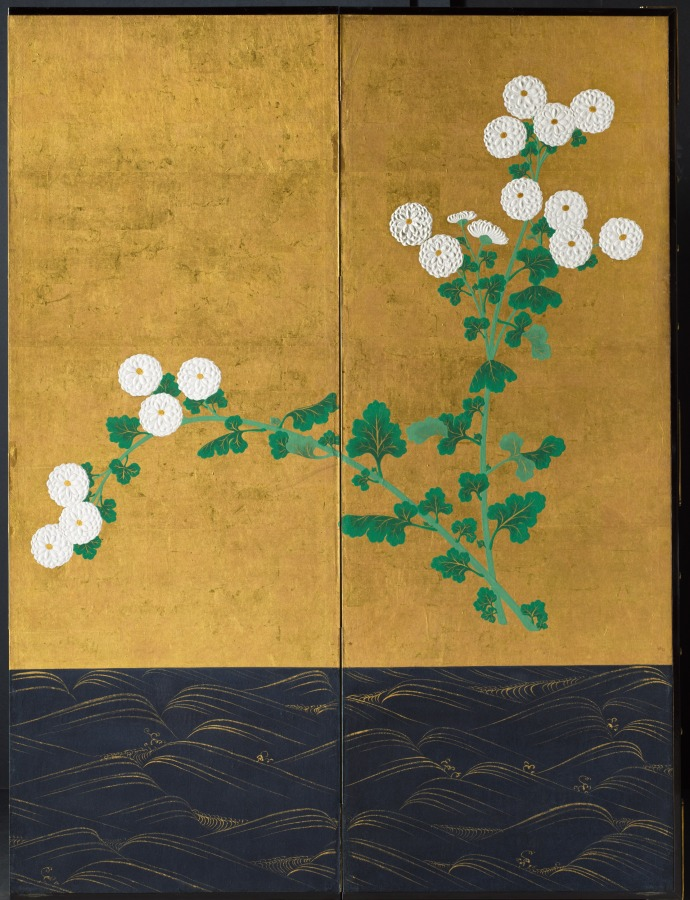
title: Chrysanthemums by a Stream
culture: Japan, Edo period (1615–1868)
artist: possibly by Ogata Kōrin (Japanese, 1658–1716)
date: c. 1715–30 or after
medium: One of a pair of six-panel folding screens; ink and color on gilded paper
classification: Painting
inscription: the signature and seal of Korin, "sensen mappa (makko) inshi hokyo Korin" (late generation hermit of the Kamo stream tradition) is written in two lines. A circular seal which reads "Hoshuku" is at the end of the second line on the edge of the first panel from the right.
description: These screens recall a painting style so closely identified with Ogata Kōrin (1658–1716) that it is called Rinpa, or “Rin School,” after the ideograph “rin” in his name. The highly stylized background accentuates floral groupings that have been groomed so as to appear utterly artificial, like the synthetic arrangements available today. Kōrin's genius derived in large measure from natural phenomena painstakingly observed and then manipulated to create compositions of startling refinement and sparkling isolation. This process may have grown out of Kōrin's early immersion in the family textile business, a medium that encourages such dramatic distillations of form: the stream's gold-crested waves bring to mind traditional kimono robe designs of Kōrin's era. Works with the signature seen on this painting, including a style name, or persona suggested to Kōrin by his brother Kenzan (1663–1743), are sometimes considered to have been produced either in the last year of his life, when he was very ill, or after his death. In both scenarios, the lion’s share of the work would have been done by studio assistants, but little is truly known of his studio practice. Given the regularity of the gold waves on the stream, and the tension in the arrangement of the chrysanthemums, it is also possible that the screens were made in emulation of Kōrin's designs by a later artist.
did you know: The signature used on these screens may indicate paintings made in the last year of the artist's life, or works completed by his studio after his death.